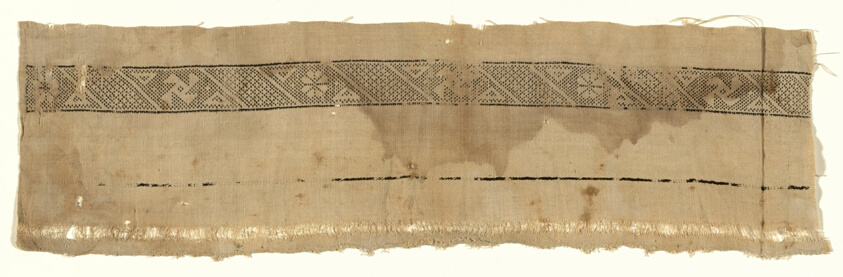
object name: Textile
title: Border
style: arabian, ayyubid, fatimid, mamluk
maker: Egypt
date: Arab period (641–969)/Fatimid period (969–1171)/Ayyubid period (1171–1250)/ Mamluk period (1250–1517), 9th/13th century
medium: Linen, plain weave; embroidered with silk floss in long-armed cross and running (pattern darning) stitches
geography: Egypt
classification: textile; needlework (visual works)